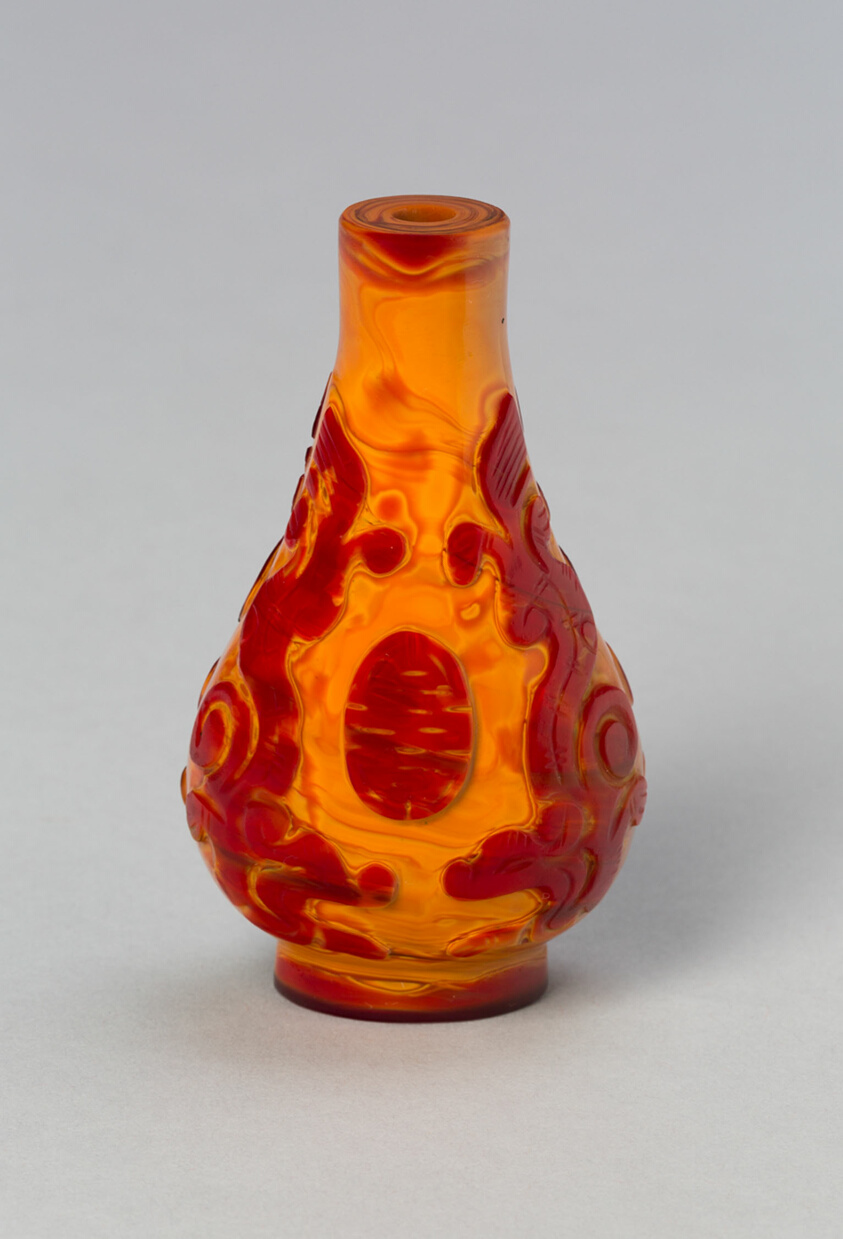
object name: Vessel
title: Pear-Shaped Snuff Bottle with Stylized Dragons and Stylized "Shou" (Longevity) Character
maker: China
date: Qing dynasty (1644–1911), 1730–1800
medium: Glass in imitation of realgar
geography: China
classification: snuff bottle; asian art; vessel